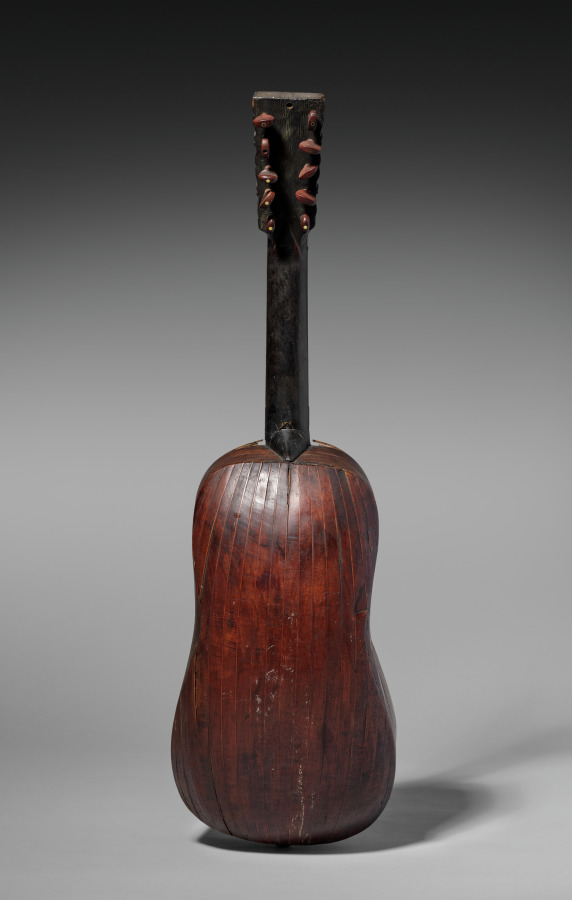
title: Chittara Battente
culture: Italy, 15th century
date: 1400s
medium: wood, paper?, sound hole, bone bridge, sheet metal inlay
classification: Musical Instrument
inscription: bears broken ticket of parchment.